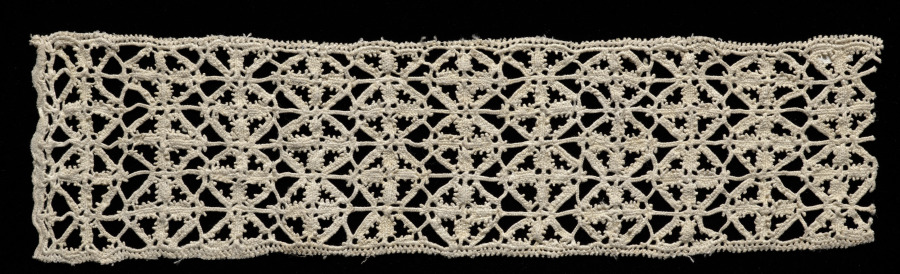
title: Lace Band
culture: Italy, 1700s-1800s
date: 1700s-1800s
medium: Linen: needle lace (Reticella)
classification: Lace